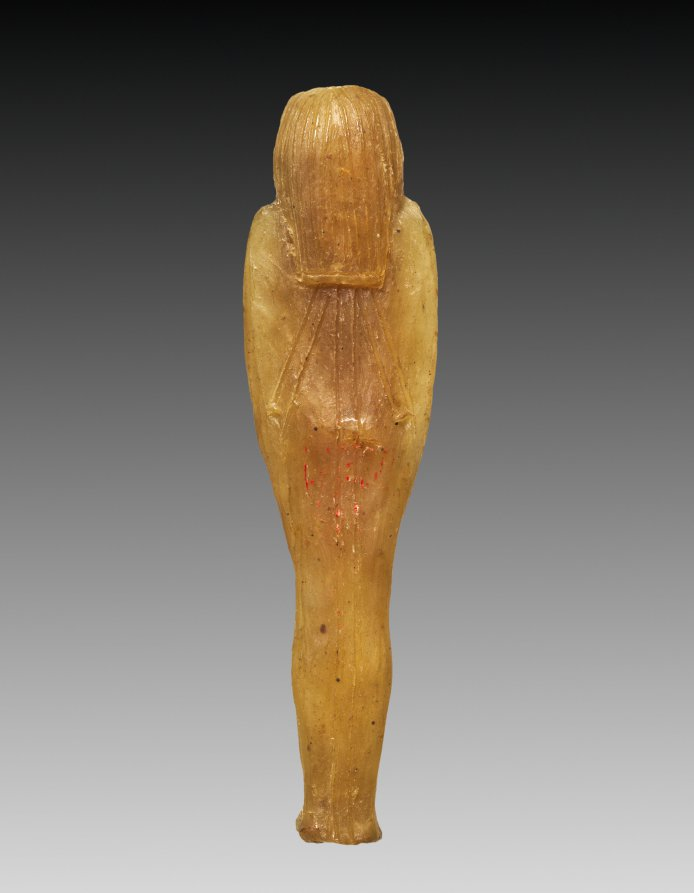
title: Son of Horus: Imsety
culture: Egypt, Third Intermediate (1069–715 BCE), Dynasties 21–22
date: 1000–900 BCE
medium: honey-colored wax with dark amber varnish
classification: Funerary Equipment